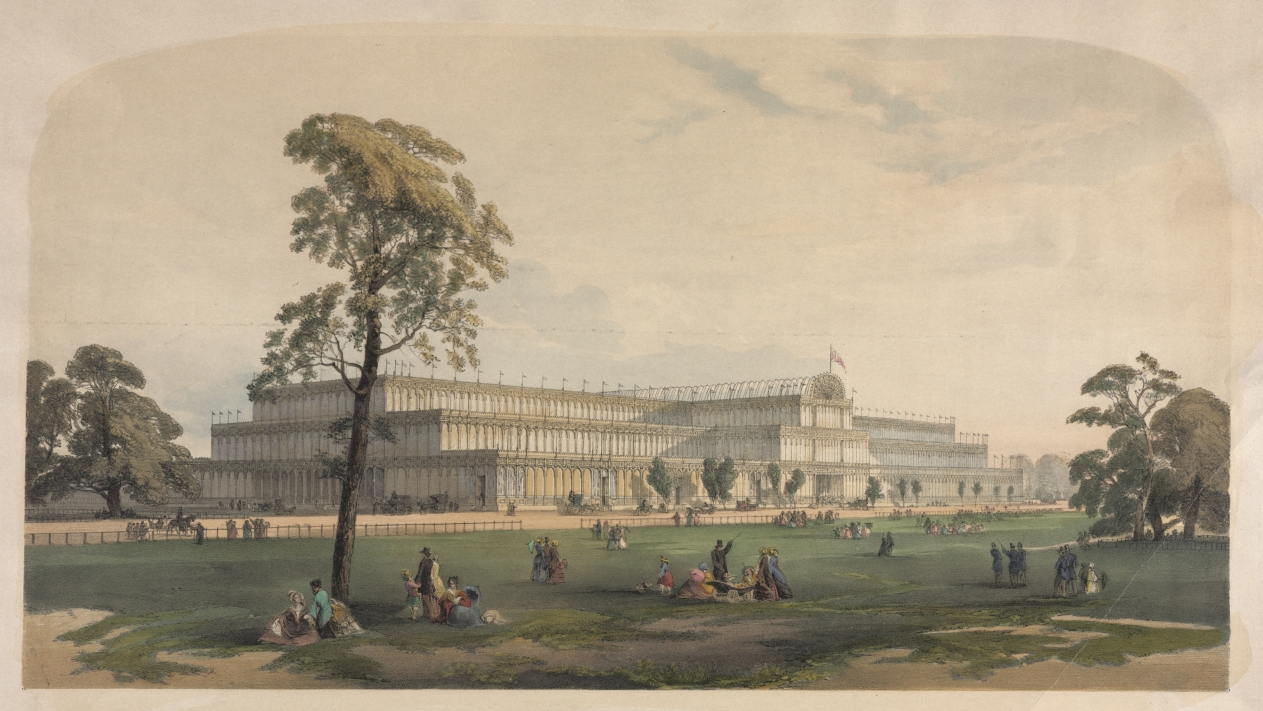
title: The Crystal Palace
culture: England, 19th century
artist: possibly by Joseph Nash (British, 1808–1878)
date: c. 1850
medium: lithograph, hand colored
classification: Print